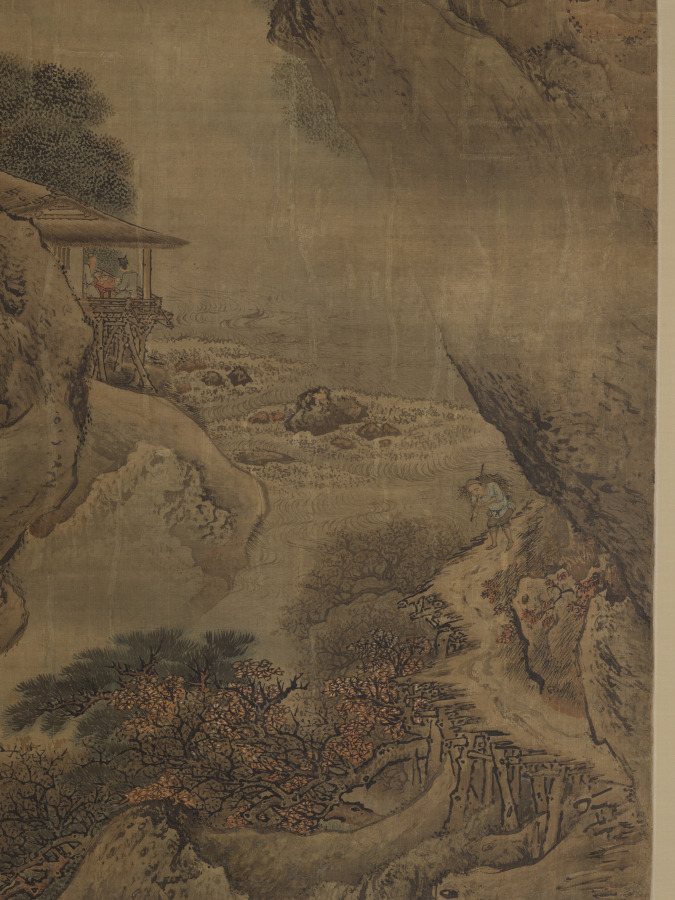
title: Road to Shu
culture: China, Qing dynasty (1644–1911), Qianlong reign (1736–95)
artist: Yuan Yao (Chinese, active mid-1700s)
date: 1743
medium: Hanging scroll; ink and color on silk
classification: Painting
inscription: artist's seals: yuan yao shi yin 袁耀 之印, zhao dao shi 昭道 氏 two collector’s seals: jin ju and illegible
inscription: Shu han xinglü //shi guihai xia //Hanshang Yuan Yao hua// 蜀椷行旅时癸亥夏- 邗上 袁耀 画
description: Few works by the Yuan workshops in Yangzhou present a continuous composition of such monumental scale as this hanging scroll. Road to Shu (in Sichuan province) depicts the trade of goods over long distances and through mountainous terrain. Busy travelers lead mules over footbridges, mountain paths wind along steep slopes, and soaring bridges connect peaks divided by deep gorges. The Yuan studios produced paintings to decorate the residences of wealthy Yangzhou salt merchants and princely palaces. The title Road to Shu refers to the historical drama of the flight of Tang emperor Xuanzong (reigned 712–56) to Sichuan in the aftermath of the An Lushan Rebellion (755–63). At the same time, the scenery alludes to Anhui, the mountainous native country of many of the salt merchants and their trade routes in northern parts of the empire.